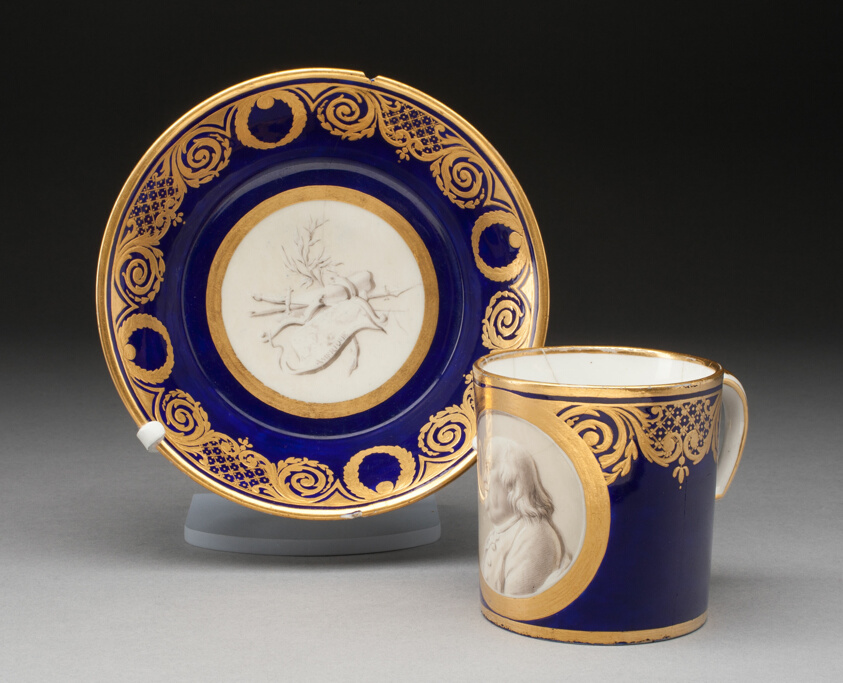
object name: Ceramics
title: Cup and Saucer with Portrait of Benjamin Franklin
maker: Sèvres Porcelain Manufactory; French, founded 1740; Painted by Etienne-Charles Le Guay (French, 1762-1846)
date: c. 1780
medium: Soft-paste porcelain, blue ground, and gilding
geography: Sèvres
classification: drinking vessel; teaware; porcelain; european decorative arts; ceramics